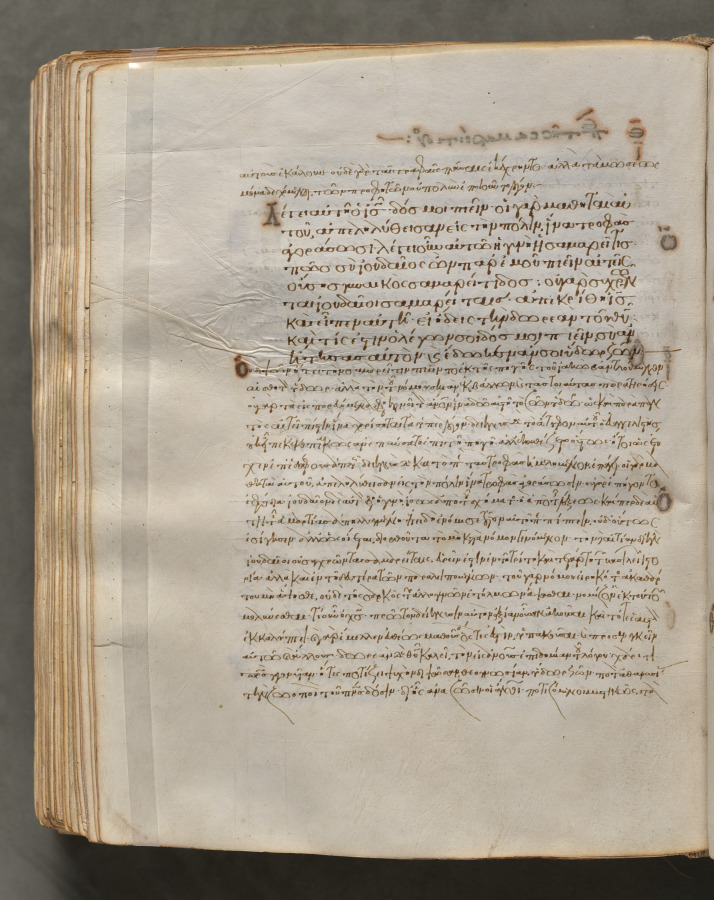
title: Text, folio 337 (verso), from a Gospel Book with Commentaries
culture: Byzantium, Constantinople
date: c. 1000–1100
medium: ink, tempera, and gold on vellum; leather binding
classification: Bound Volume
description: Each of the four gospels in this book opens on a page with brilliantly illuminated borders depicting the author of the text as well as birds—principally peacocks, symbols of the immortality of the soul—and fountains, representing the fountain of life and the salvation of the soul. This volume consists of 428 leaves with texts in Greek. Its level of sophistication suggests that it was probably written and decorated in a monastery in Constantinople.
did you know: Gospel books were carried in procession through Byzantine churches.